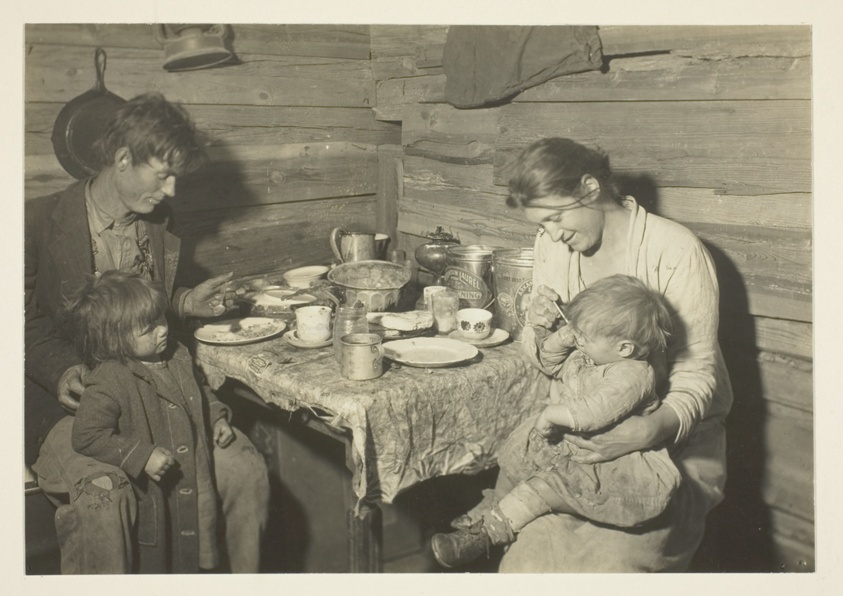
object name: Photograph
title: Poor Rural Family Living In A Smoke-House, Oklahoma, In Care Of Red Cross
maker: Lewis Wickes Hine (American, 1874–1940)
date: 1931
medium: Gelatin silver print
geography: United States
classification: gelatin silver (developing-out-paper) pr; photographic process; photography; photograph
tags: Collected by Hugh Edwards, documentary